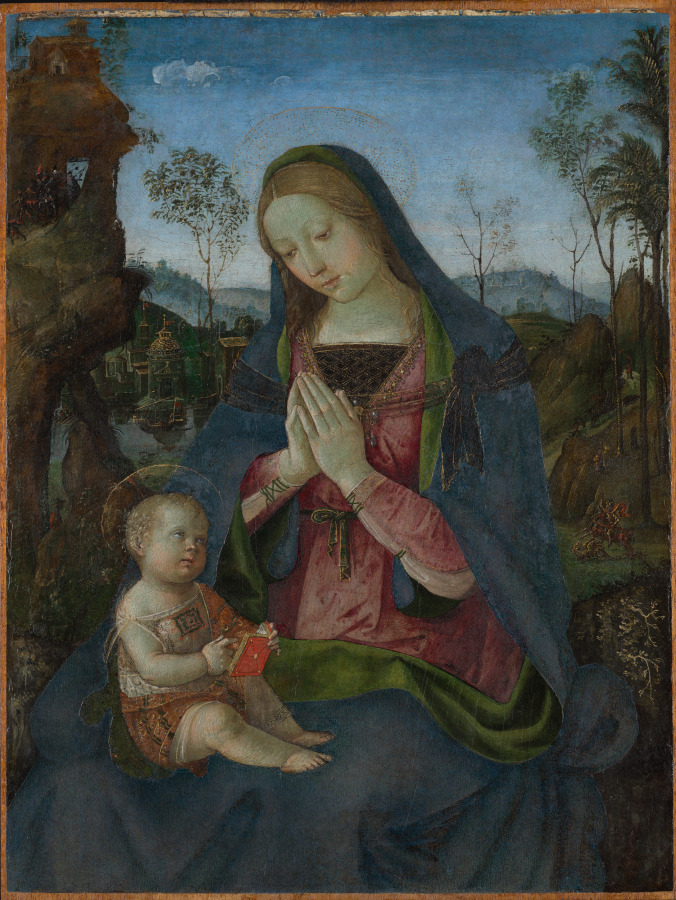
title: Virgin and Child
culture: Italy, late 15th Century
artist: Pintoricchio (Italian, c. 1454–1513)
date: c. 1490–1500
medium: tempera and oil on wood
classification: Painting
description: Bernardino di Betto, called Pinturicchio, is said to have acquired his nickname ("little painter") because of his small stature, and used it to sign some of his paintings. Born in Perugia, the provincial capital of Umbria, he trained under local artists, eventually becoming a paid assistant of the painter Perugino. He is known to have assisted Perugino on his frescoes in the Sistine Chapel and eventually established his own reputation as a respected artist. Many of his commissions were for churches and wealthy families in Umbria and elsewhere. Though the source of this painting is unknown, it was likely produced for a home or private chapel.